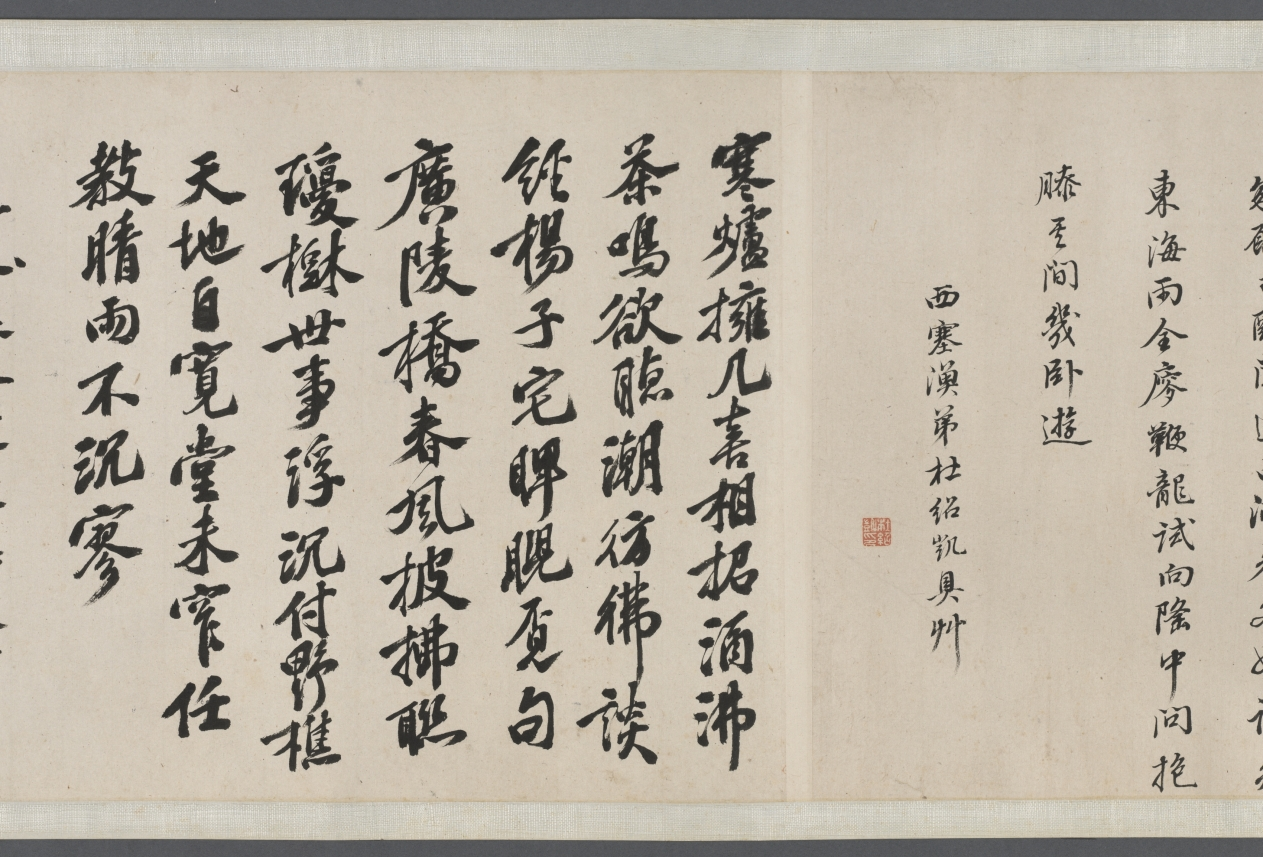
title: Spring Rain Thatched Hut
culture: China, Qing dynasty (1644-1911)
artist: Wang Jianzhang (Chinese, active 1621–1662)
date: 1650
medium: handscroll, ink on paper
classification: Drawing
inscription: Title by Wu Zhiying 吳芝瑛 (1868–1933), dated 1910.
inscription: 春雨草堂圖。庚寅仲春，為紫玄社兄畫於若耶溪上。 仲初王建章。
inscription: 12 colophons by Gong Weiliu’s 宮偉鏐 (1611–1680) contemporaries: Fang Gongqian 方拱乾 (1596–1667, jinshi of 1628); Jiang Cai 姜埰 (1607–1673); Liang Yizhang 梁以樟 (1608–1665); Du Shaokai 杜紹凱 (also named Du Jie 杜岕, 1617–after 1689), dated 1648; Zhao Kaixin 趙開心 (d. 1663), dated 1647; Zhao Erbian 趙而忭 (d. 1658); Yu Yaoguang 余耀光, dated 1649; Yao Quan 姚佺, dated 1648; Chen Taisun 陳台孫 (b. 1611, jinshi of 1640); (Monk) Shao 韶; Du Zhujin 杜祝進; and Tang Shi 唐時.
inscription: 此研田莊居士王建章為先太史紫元公所作春雨草堂圖也。居士字仲初，明崇禎間人，與先太史及惲香山相友善。喜畫佛像，自謂不讓李公麟。山水祖述董源，筆力雄健，有不可羈勒之概。香山稱其墨有五采，非世人所知。然性廉重，非同志不輕落筆，人得其寸圖尺縑，必相與忻賞，如獲蜼彝兕敦，非人世間物也！見先太史筆記，此圖寫雨景，而氣韻生動，勃勃於不能止。每一展覽，覺滿紙雲烟，墨瀋猶濕，如寫吾先人胸中未盡之邱壑也。圖後題詠，多一時名手，想見文采風流之盛。迄今二百餘年，舊德先疇，遺風未沫。吾子孫其永寶之，如與吾先人接謦咳於一堂，為感思之助，其敢作圖畫觀乎！同時香山亦有圖佚去己久，不知異日能為延津之合否。壬申長夏本昂重裝敬識。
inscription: Collectors' seals including: Gong Ben'ang 宮本昂 (1821–1874); Lian Qian 廉泉 (1868–1932); Wu Zhiying 吳芝瑛 (1868–1933)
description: With its striking simplicity, this painting captures the pure serenity of a private garden in the moist atmosphere of a spring morning on a small river. Painted in the style of Ni Zan, Wang Jianzhang dedicated this work to his patron-friend Gong Weiliu (1611-1680). Gong retired from government service after the fall of the Ming dynasty and constructed a garden-retreat at his native home in Taizhou, Jiangsu province. He invited scholars and poets from his literary society to contribute writings of his estate, which are here mounted together with the painting in this scroll.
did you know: Gong Weiliu, the owner of the estate portrayed here, had received his prestigious jinshi degree in 1643, but his official career was thwarted by the collapse of the Ming dynasty the following year.